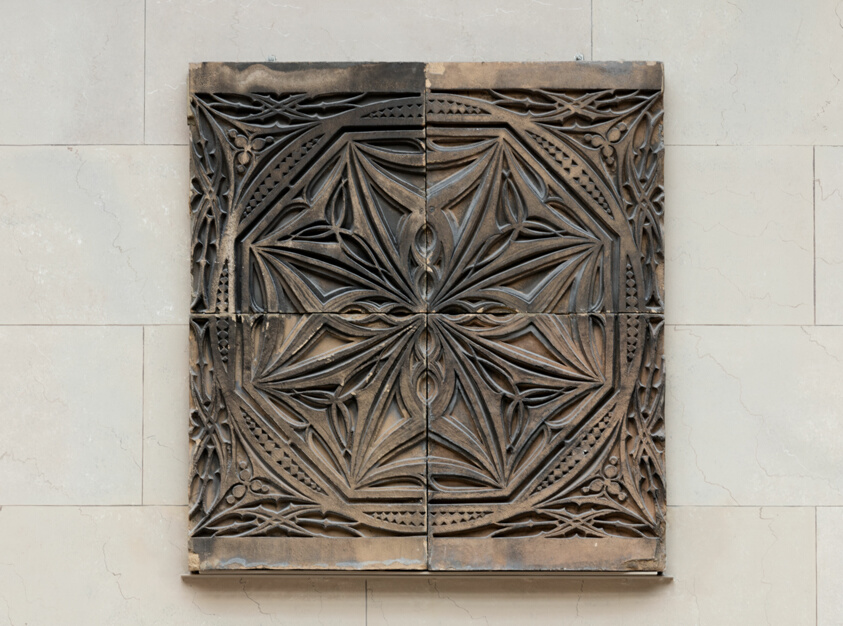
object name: Architectural fragment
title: Spandrel Panel from the Saint Nicholas Hotel, St. Louis, Missouri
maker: Adler & Sullivan; American, 1883-1895; Designer: Louis H. Sullivan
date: 1892/93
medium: Terra-cotta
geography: Saint Louis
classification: architectural fragment; architecture